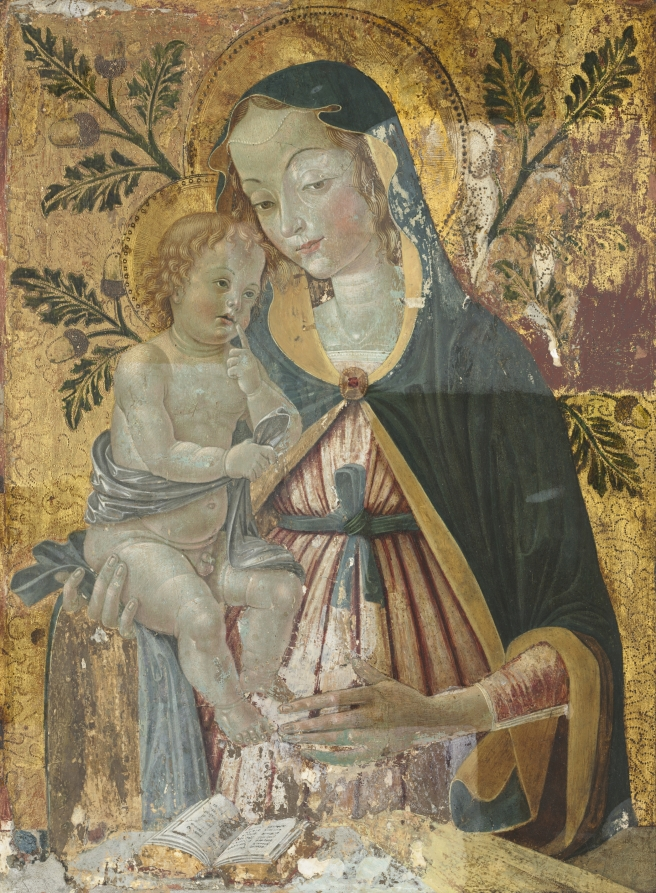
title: Virgin and Child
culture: Italy, Umbria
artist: circle of Fiorenzo di Lorenzo (Italian)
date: c. 1500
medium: tempera and gold on wood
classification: Painting